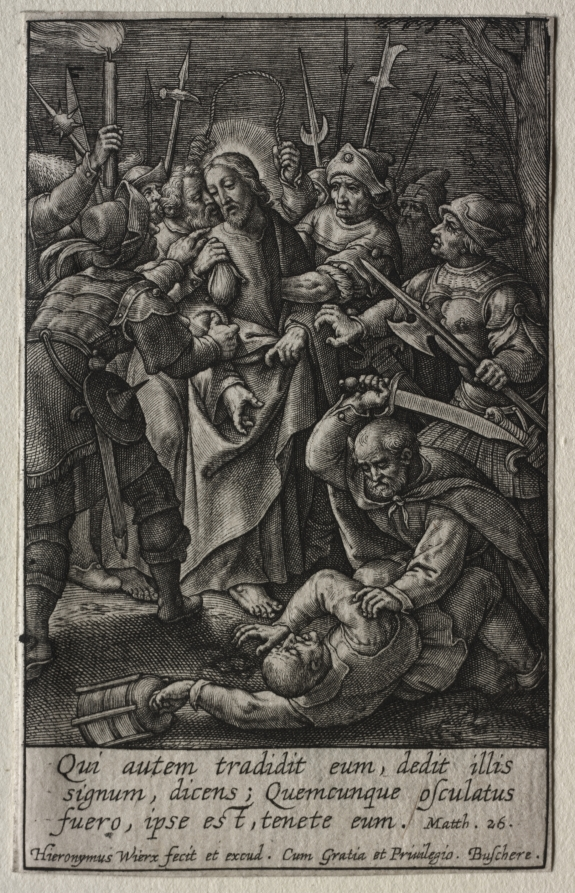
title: The Passion: The Betrayal of Christ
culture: Flanders, late 16th-early 17th century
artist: Hieronymus Wierix (Flemish, 1553–1619)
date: before 1619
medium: engraving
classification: Print